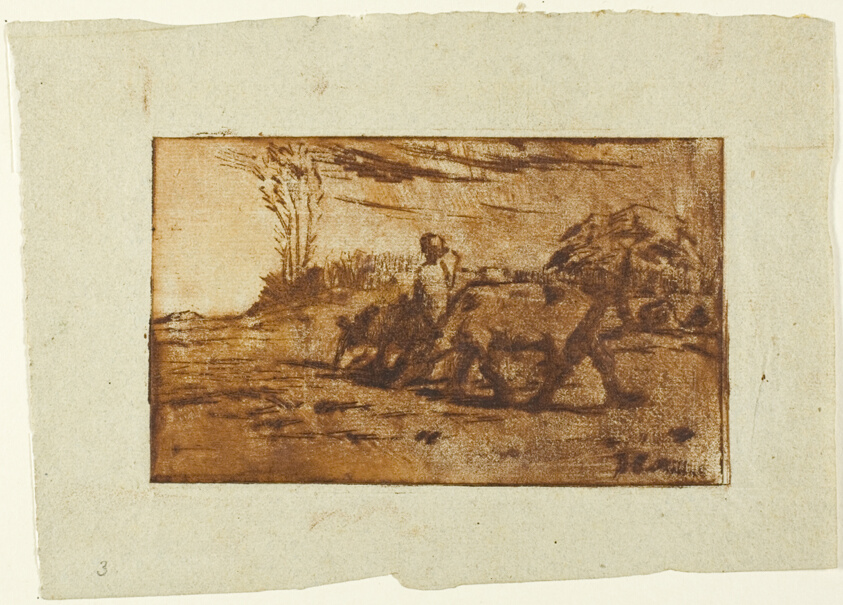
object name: Print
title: The Two Cows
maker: Jean François Millet (French, 1814-1875)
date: c. 1847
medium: Etching and drypoint in reddish-brown ink on blue-green laid paper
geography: France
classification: etching; print; prints and drawing